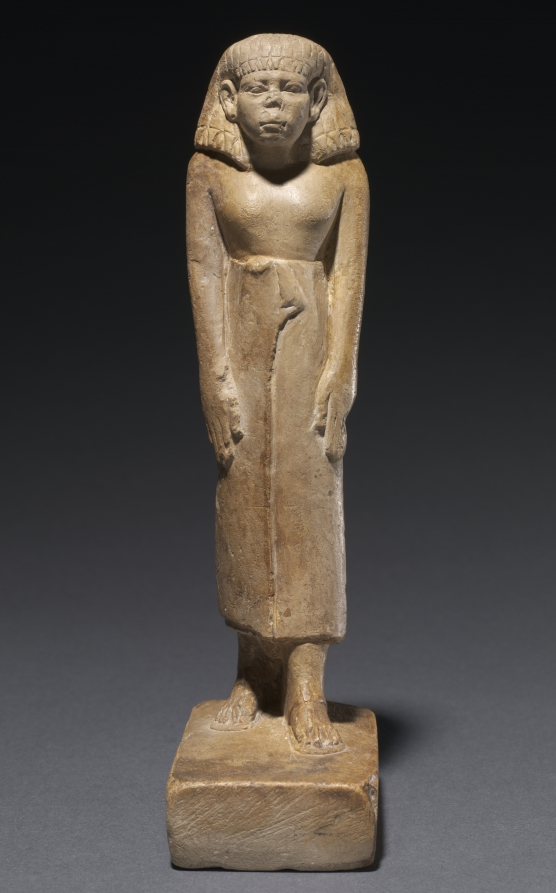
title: Statuette of a Man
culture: Egypt, Middle Kingdom (2040–1648 BCE), Dynasty 12, reign of Amenemhat III (1860–1814 BCE) or later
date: c. 1859–1648 BCE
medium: painted limestone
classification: Sculpture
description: This statuette is an example of the art of the Middle Kingdon in Egypt, which was characterized by tight, compact forms. The man represented here has his arms tucked close to his body and his shoulders raised to his wig. He is tightly wrapped in a long skirt with his feet barely separated. His posture and expression are tense and serious, reflecting the sobriety of this period in Egyptian art.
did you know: This figure has traces of white, red, and black pigment.